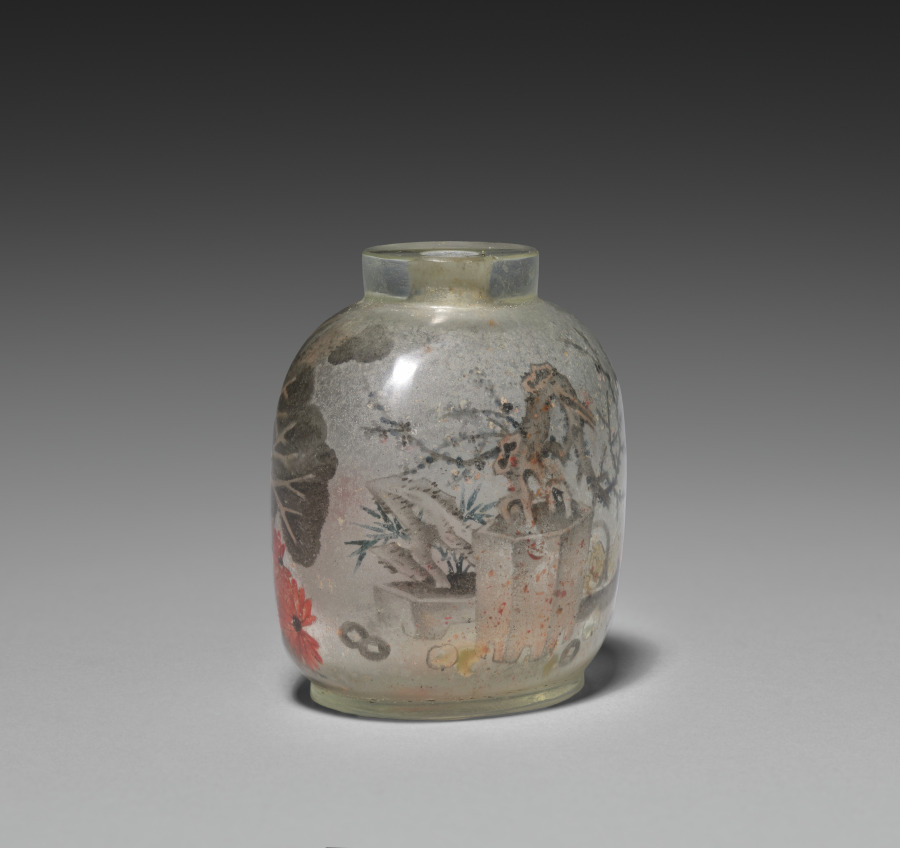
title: Snuff Bottle with Stopper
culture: China, Qing dynasty (1644–1911), Qianlong reign (1736–95)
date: 1736–95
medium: crystal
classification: Stone